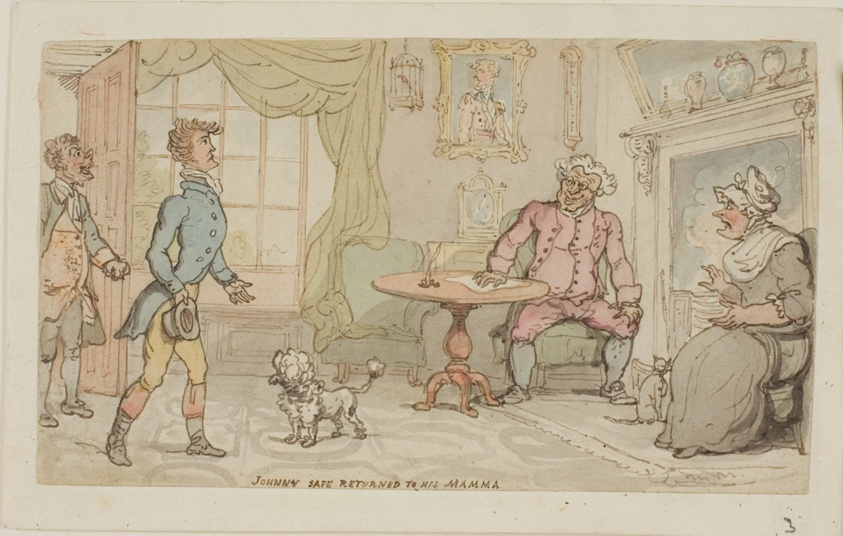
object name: Drawing and Watercolor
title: Johnny Safe Returned to His Mamma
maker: Thomas Rowlandson (English, 1756-1827)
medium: Watercolor on paper (removed from book)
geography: England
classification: watercolor; drawings (visual works); prints and drawing